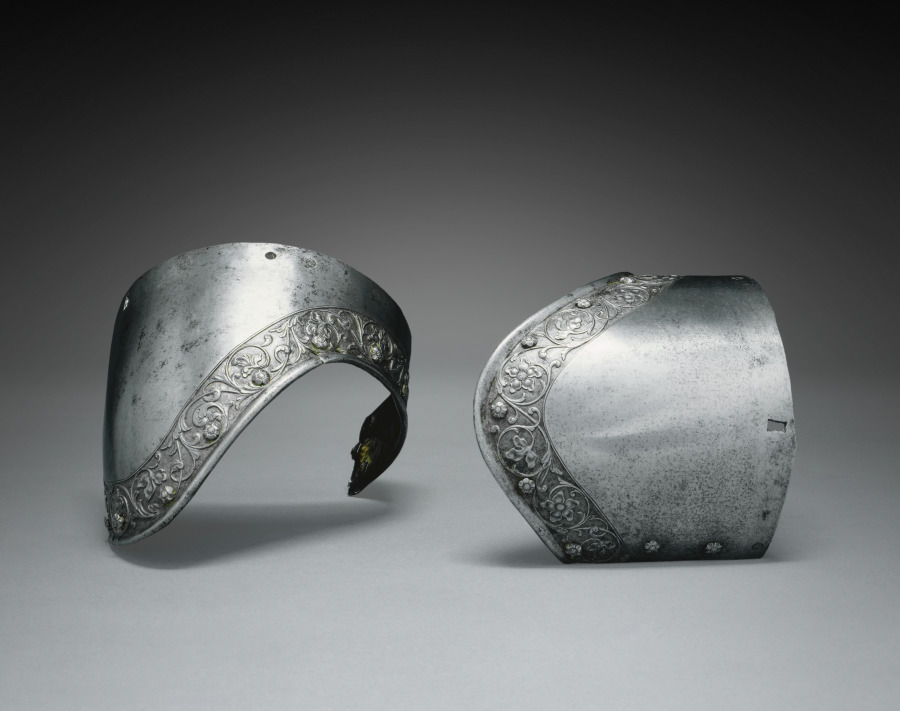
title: Pair of Upper Arm Canons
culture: Itlay, Milanese style of 16th century, probably 19th century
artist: attributed to Negroli Workshop (Italian, c. 1500–1561)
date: 1800s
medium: steel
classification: Arms and Armor